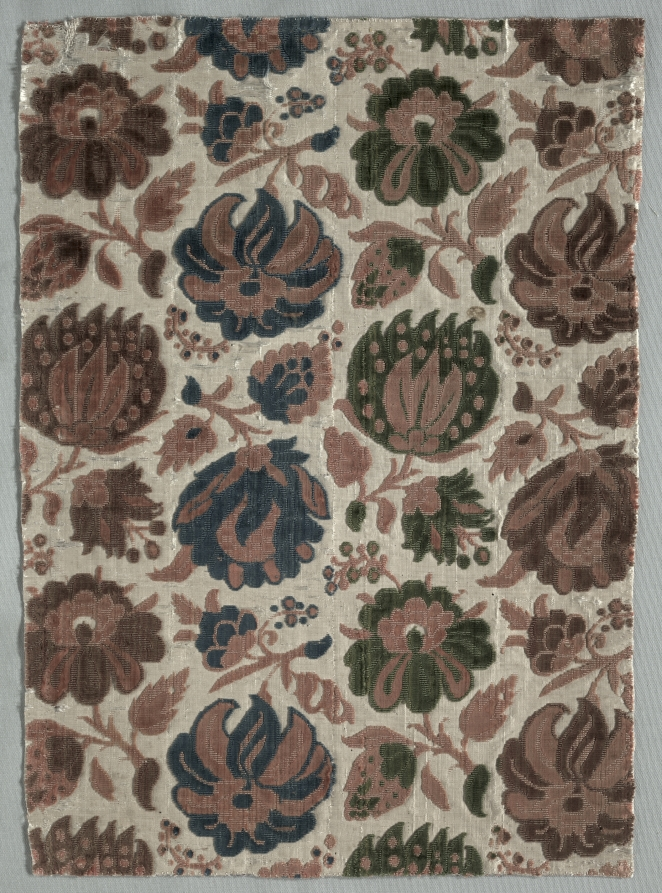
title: Velvet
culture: Italy, 17th century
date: 1600s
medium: velvet (cut and uncut); silk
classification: Velvet